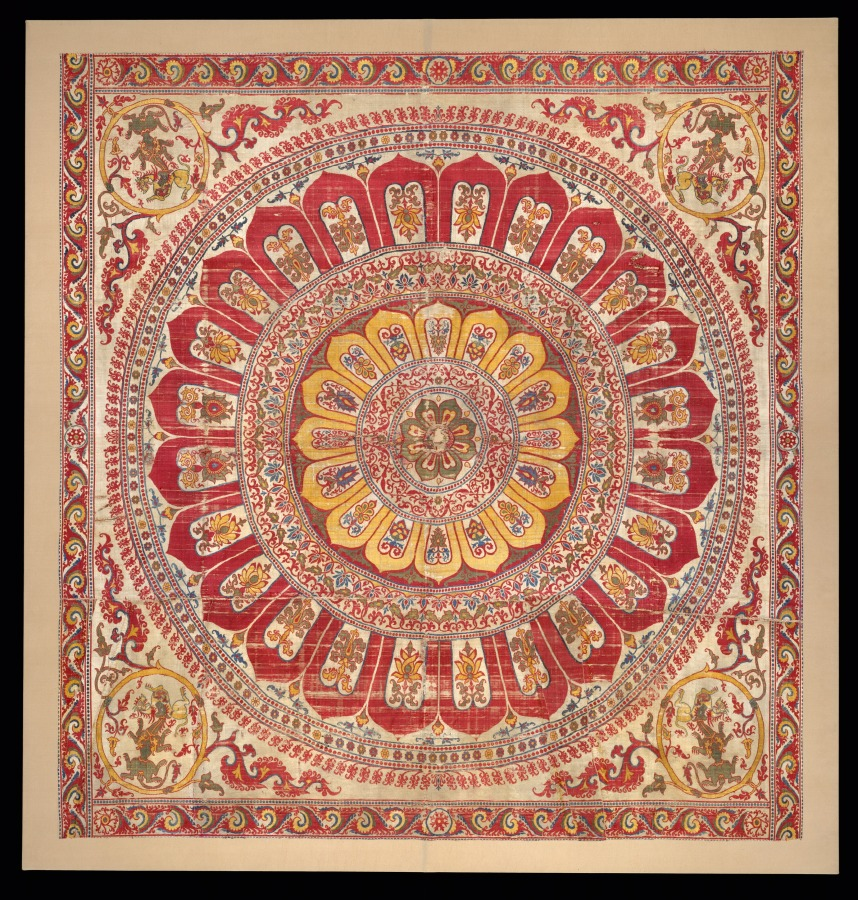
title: Lotus-blossom petal canopy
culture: Northern India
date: c. 1600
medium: silk: lampas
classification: Textile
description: The ceilings of sacred spaces throughout India were carved or painted with concentric circular lotus patterns; many also included textile canopies with the same designs. This exceptionally large example was woven in one complete section on a single loom. In India, the full-blown lotus flower bears solar connotations. It projects the radiance of a sacred or royal presence below. The motif of a dragon bearing down on a winged lion in each of the four corners indicates the designer’s recognition of a motif popular across Islamic Asia, from Turkey to Iran and Mughal India.